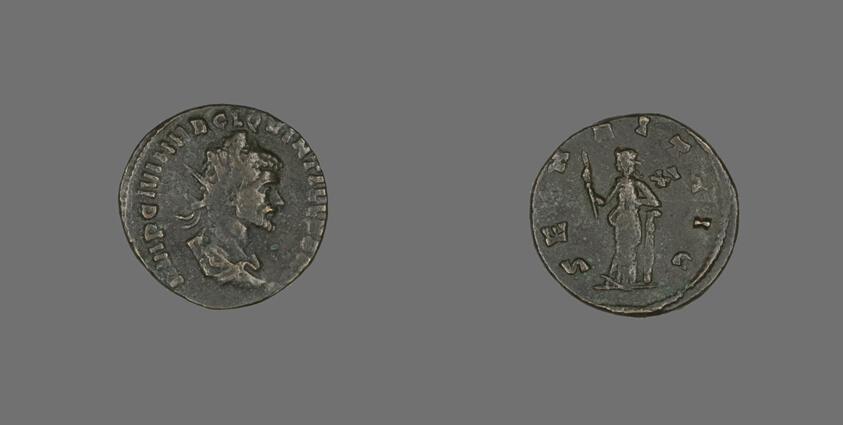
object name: Coin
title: Coin Portraying Emperor Quintillus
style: imperial (roman), ancient, roman (ancient, style or period)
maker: Roman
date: 270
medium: Bronze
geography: Roman Empire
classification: coin; struck; ancient art